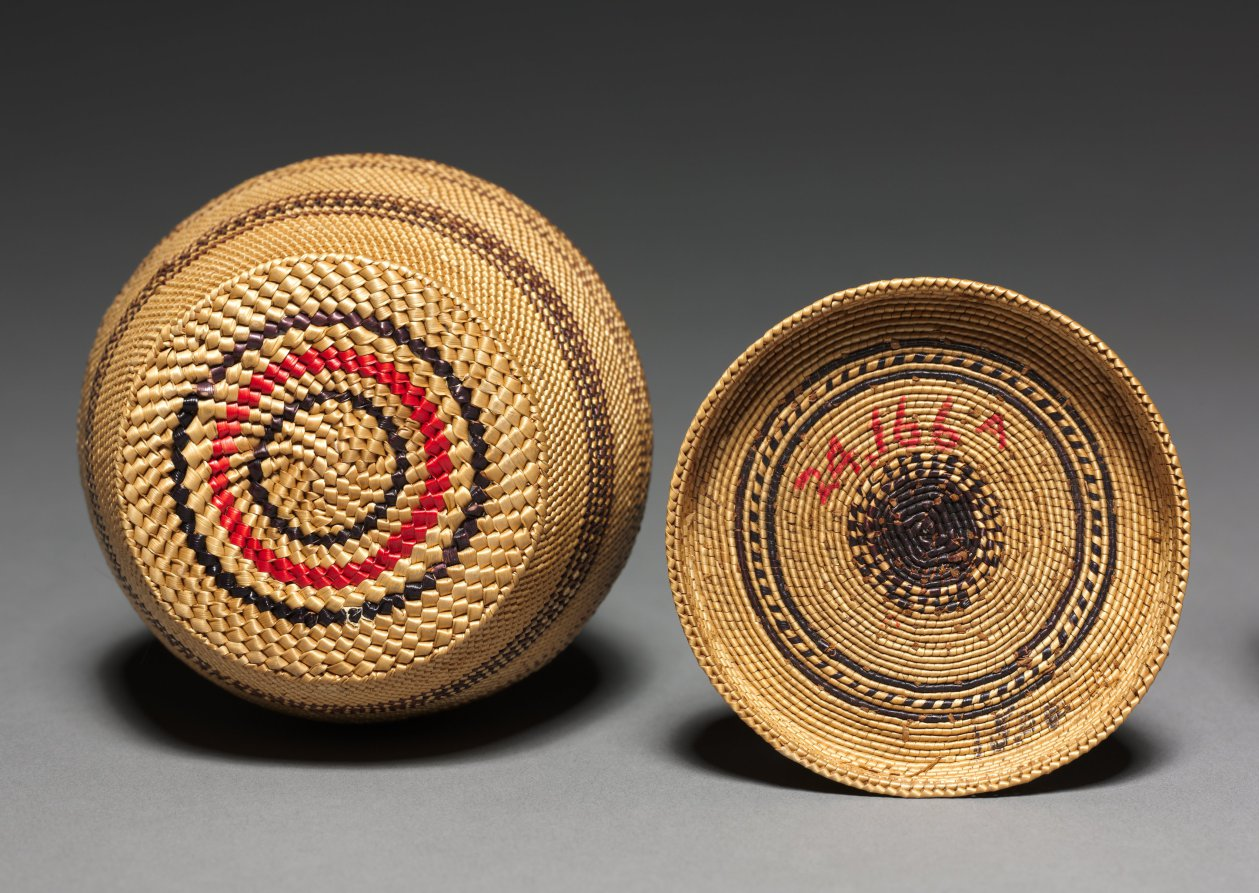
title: Covered Bowl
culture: Northwest Coast, Vancouver Island, late 19th century (?)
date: c. 1875–1900?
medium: twined grass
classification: Basketry